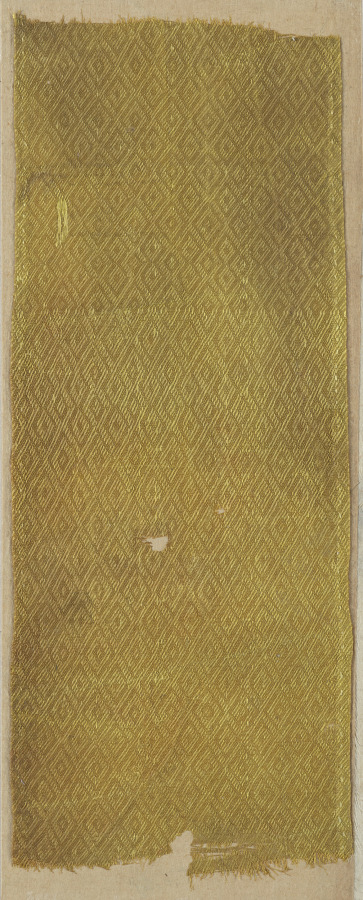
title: Fragment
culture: China, 8th century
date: 700s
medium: plain cloth, twill patterned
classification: Textile